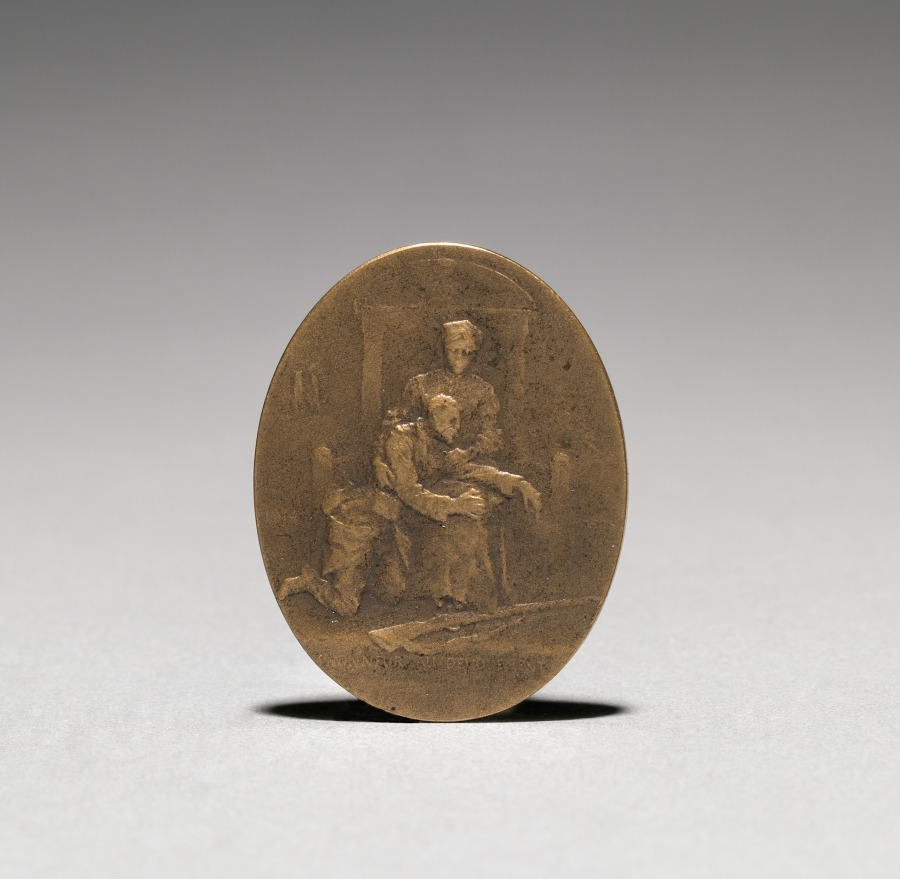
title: Medallion (obverse)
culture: France, 19th-20th century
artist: Jean Paul Aube (French, 1837–1916)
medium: bronze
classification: Metalwork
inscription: "Honneur au devouement" (honor to self sacrifice); inscribed: "P. Aube."